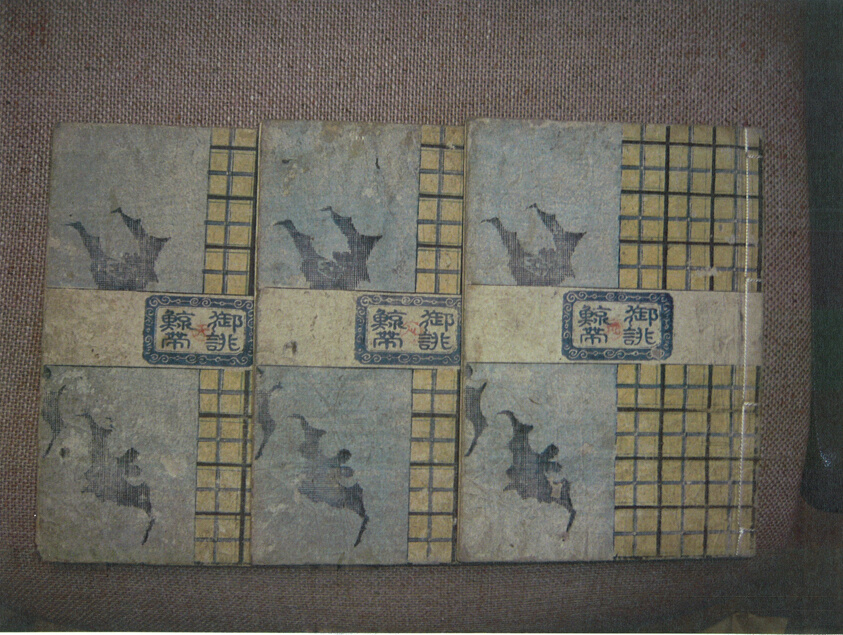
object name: Book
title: Oatsurae Kujiraobi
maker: Utagawa Kuninao (Japanese, 1792-1854)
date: 1826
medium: Color woodblock printed books, 3 volumes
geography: Japan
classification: book